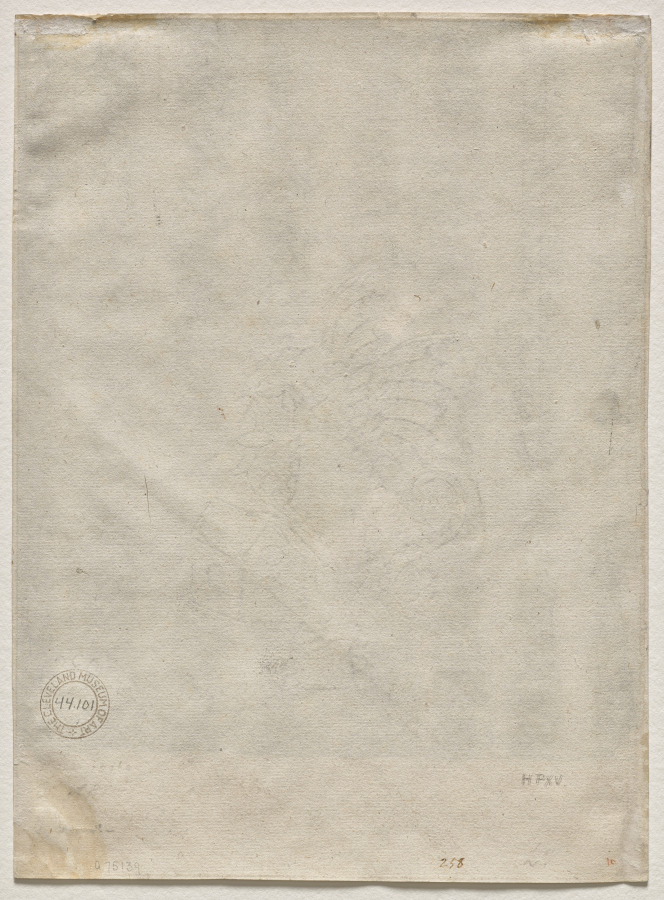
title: Ephraim Bonus, Jewish Physician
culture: Netherlands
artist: Rembrandt van Rijn (Dutch, 1606–1669)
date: 1647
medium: etching, drypoint and engraving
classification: Print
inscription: lower right, in plate (barely visable): Rembrandt f. 1647 ; VERSO, lower left, in graphite: 280 ; lower left, in graphite: 6350 ; lower left, in graphite: a 17539 ; lower left, in graphite: 17060 ; lower left, in graphite: A.H.L.-- ; lower left, in graphite: [illegible] ; lower right, in graphite: HPXV ; lower right, in pen and brown ink: 258 ; lower right, in graphite: L. ; lower right, in red chalk: 10